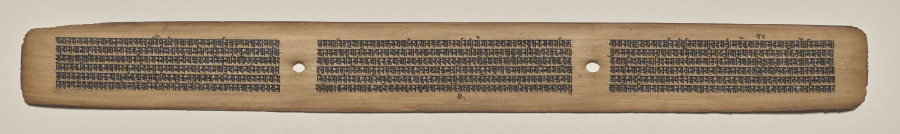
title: Text, Folio 36 (recto), from a Manuscript of the Perfection of Wisdom in Eight Thousand Lines (Ashtasahasrika Prajnaparamita-sutra)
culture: Eastern India, Bihar, Vikramashila Monastery. Painting: Nepal, Kathmandu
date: Sunday, September 14, 1119 (year 239 of the Newar Samvat in the month of Ashvina)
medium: gum tempera and ink on palm leaves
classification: Painting